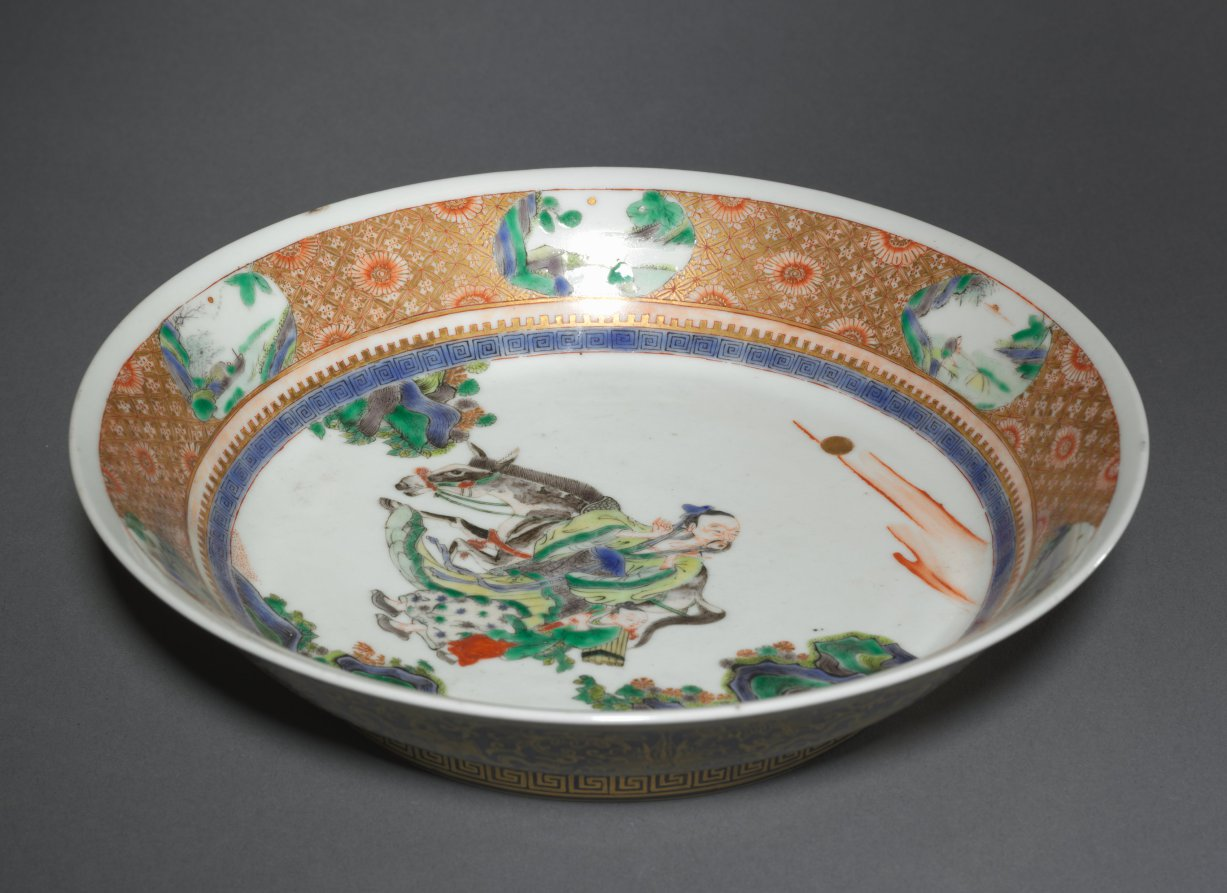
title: Dish with Zhang Guolao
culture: China, Jiangxi province, Jingdezhen kilns, Qing dynasty (1644-1911), Kangxi reign (1662-1722)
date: 1662–1722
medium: porcelain with famille verte overglaze enamel and painted gold decoration (interior) and powder blue glaze with painted decoration (exterior)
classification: Ceramic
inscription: 大清康熙年製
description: Zhang Guolao, featured on this dish, is one of the Eight Immortals and a gifted magician who was believed to know the secret arts to obtain longevity. Typically depicted as an old man and accompanied by his mule, he is the patron saint of artists. His mule is said to be magical; it can be folded up like a piece of paper to fit into a small bag. The central scene is framed by a sumptuously gold-decorated rim showing spaces reserved for landscape scenes in primarily fresh blue and green colors.